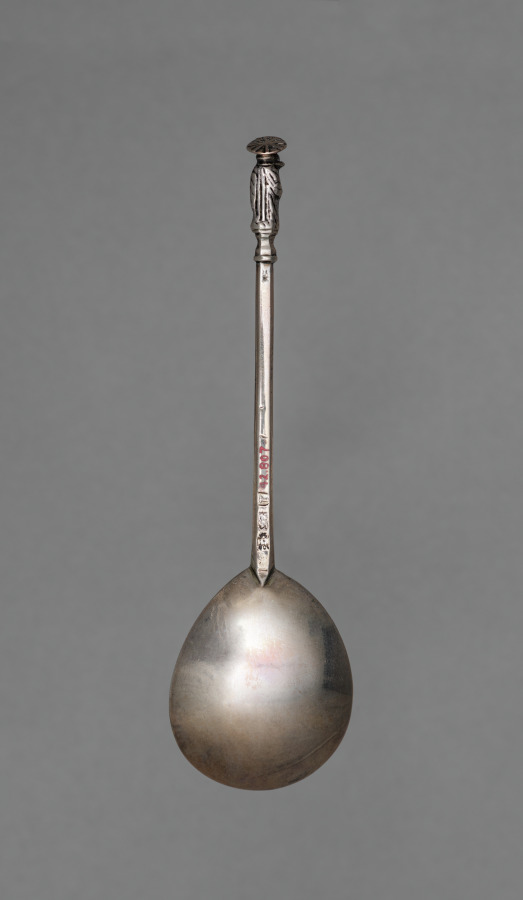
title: Apostle Spoon: St. James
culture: England, London, 17th century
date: 1634–1634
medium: silver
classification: Silver